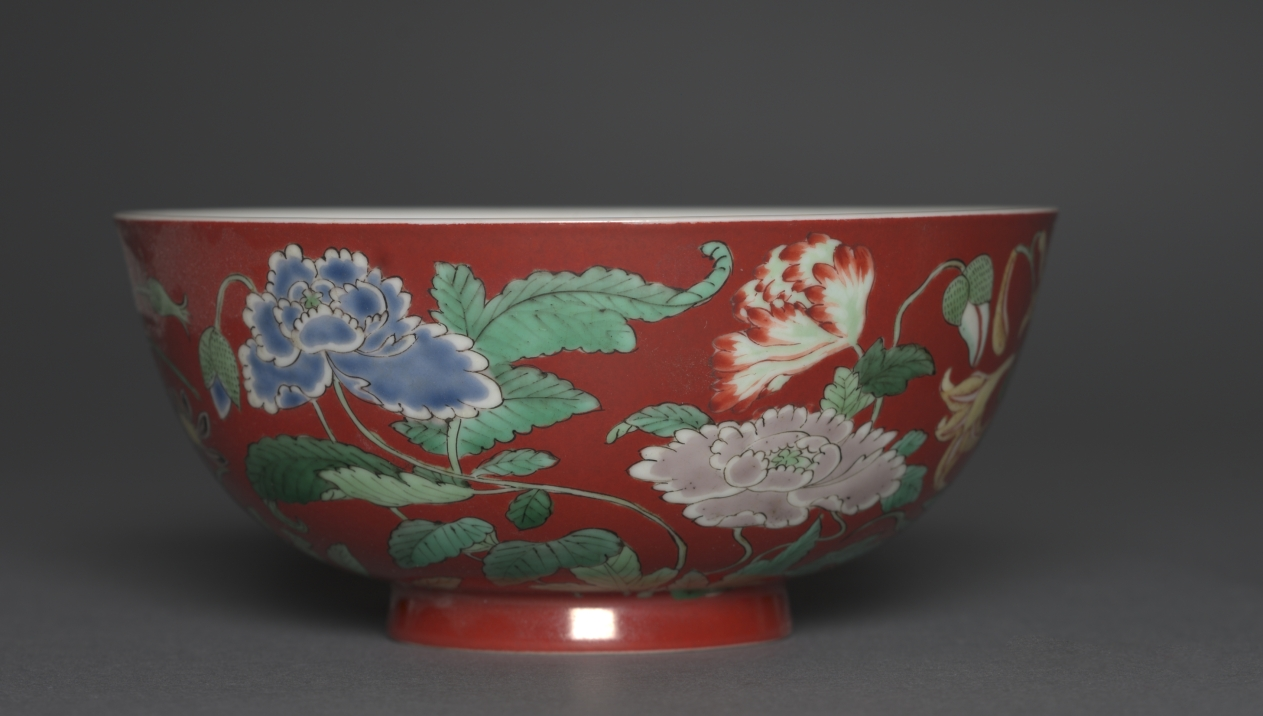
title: Bowl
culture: China, Jiangxi province, Jingdezhen kilns, Qing dynasty (1644-1911), Yongzheng mark and reign (1723-35)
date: 1723–35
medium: porcelain with overglaze enamel decoration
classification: Ceramic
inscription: 雍正御製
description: Flowers in vivid colors including peonies, lilies, and chrysanthemums are set against a brilliant red enamel ground. The petals and veins of leaves are depicted in fine outlines and soft colors demonstrating the craftsman’s excellent painting skill. This porcelain exemplifies the technical perfection of Qing dynasty court artisans who surpassed their predecessors in technical skill. The bowl bears a mark on its base reading “Made for Emperor Yongzheng 雍正御製.” The Yongzheng emperor was one of the three early Qing emperors whose taste greatly influenced art production and collecting.